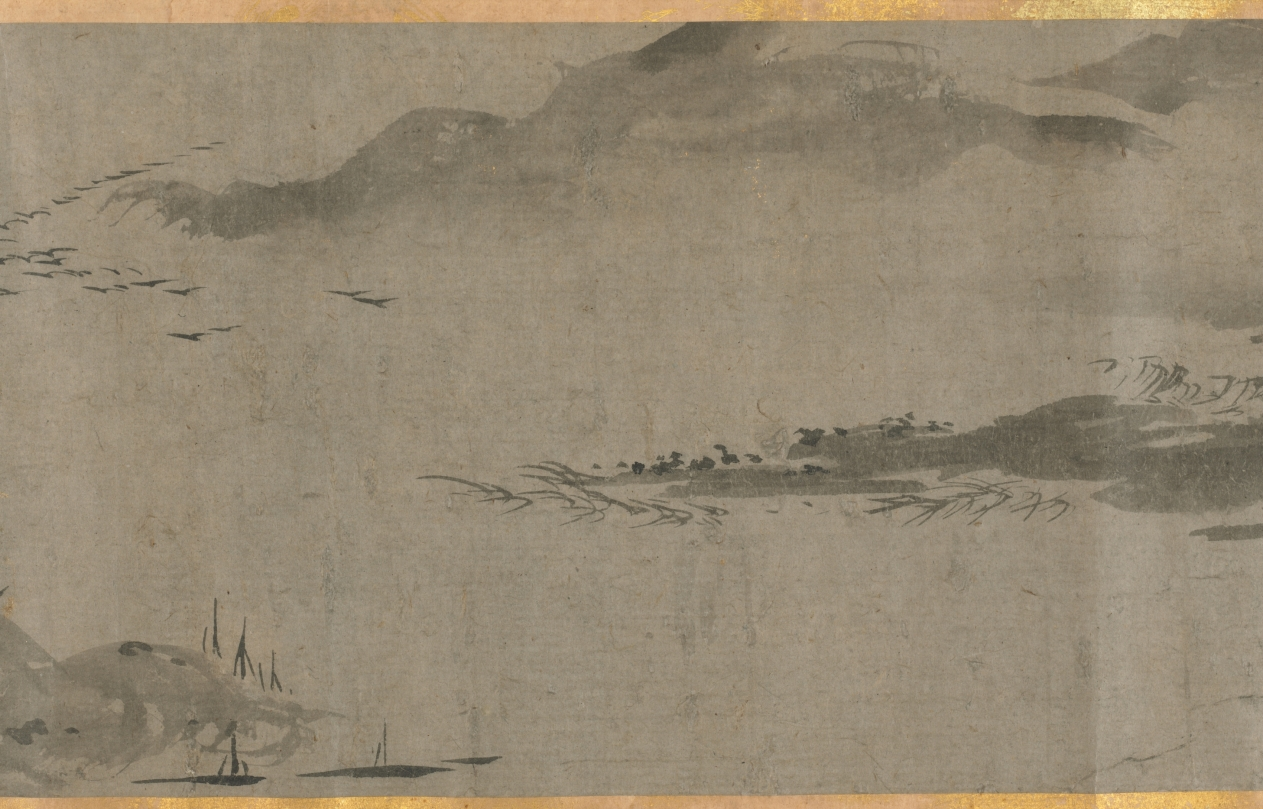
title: Eight Views of Xiao-Xiang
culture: Japan, Muromachi period (1392–1573)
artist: Sesson Shūkei (Japanese, c. 1492–c. 1577)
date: 1500s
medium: handscroll; ink on paper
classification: Painting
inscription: Signature and seal of artist at end of painting.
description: Eight Views of the Xiao and Xiang Rivers can be traced to 11th-century Chinese poems and paintings, the depiction of which had also become popular among Korean and Japanese painters. Xiao-Xiang refers to the region in present-day Hunan province where the Xiao and Xiang rivers converge. Few painters of the Eight Views had in fact seen the scenery; rather, they were trying to portray in ink and wash the lyrical qualities of dim light and a misty atmosphere typical of that region. Each of the poetic titles suggests a time of day, a season, or specific atmospheric conditions—subjects that challenged the abilities of the most talented artists. In this miniature painting (shukuzu) of the Muromachi period, Japanese Zen monk and painter Shukei Sesson depicted all eight views featured in Chinese prototypes: Wild Geese Descending to Sandbar; Returning Sails Off a Distant Coast; Mountain Market in Clearing Mist; River and Sky in Evening Snow; Autumn Moon over Dongting Lake; Night Rain on the Xiao and Xiang; Evening Bell from Mist-Shrouded Temple; and Fishing Village in Evening Glow.